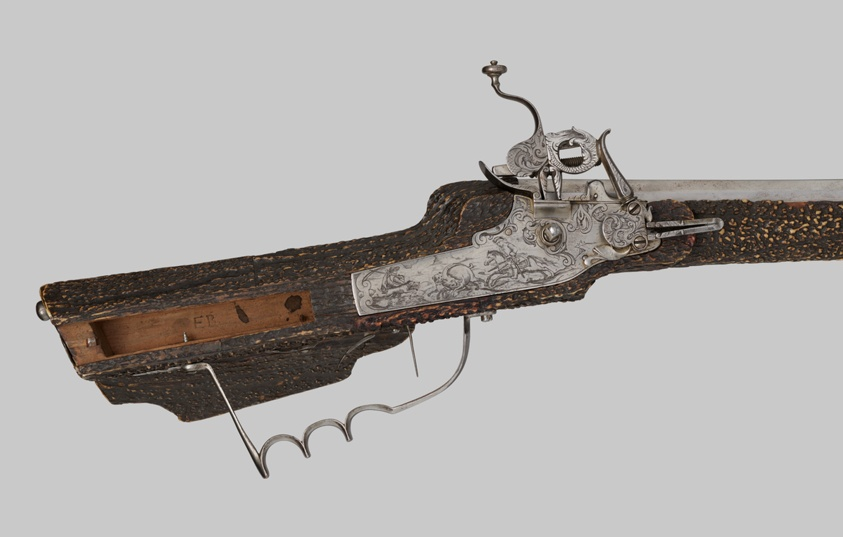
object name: Arms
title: Wheellock Rifle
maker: Elias Becker (German, Augsburg active 1633-1673); Augsburg, Germany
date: c. 1670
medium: Steel, staghorn, cherry wood, beech wood, gilt brass, copper, and enamel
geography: Augsburg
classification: firearm-long gun; arms; decorative arts; european decorative arts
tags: arms